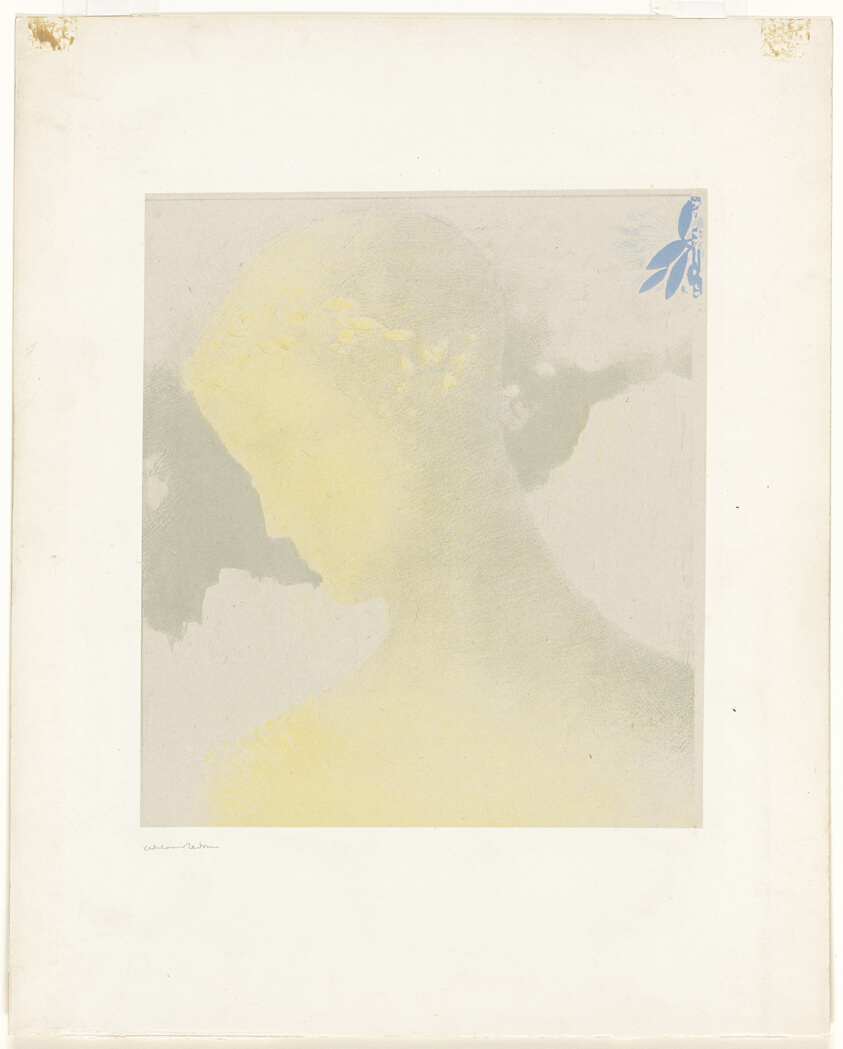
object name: Print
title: Beatrice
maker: Odilon Redon (French, 1840-1916)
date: 1897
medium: Lithograph in yellow, blue, and green on light gray China paper laid down on cream wove paper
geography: France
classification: lithograph; print; prints and drawing; paper